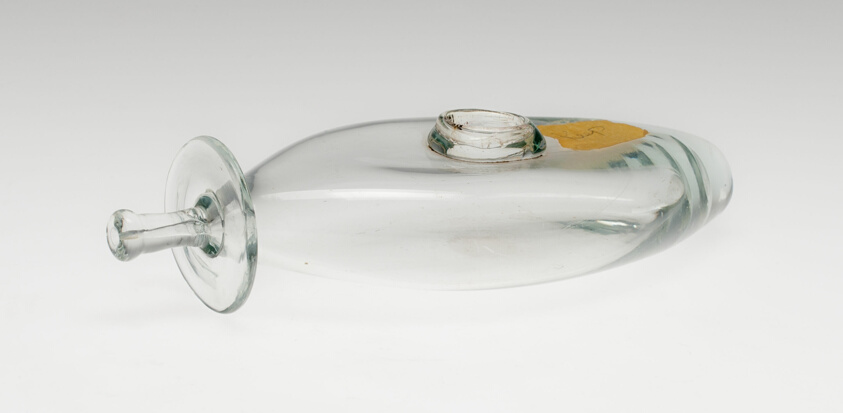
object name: Glass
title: Infant Feeding Bottle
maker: England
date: c. 1840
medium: Glass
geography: England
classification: glass; european decorative arts